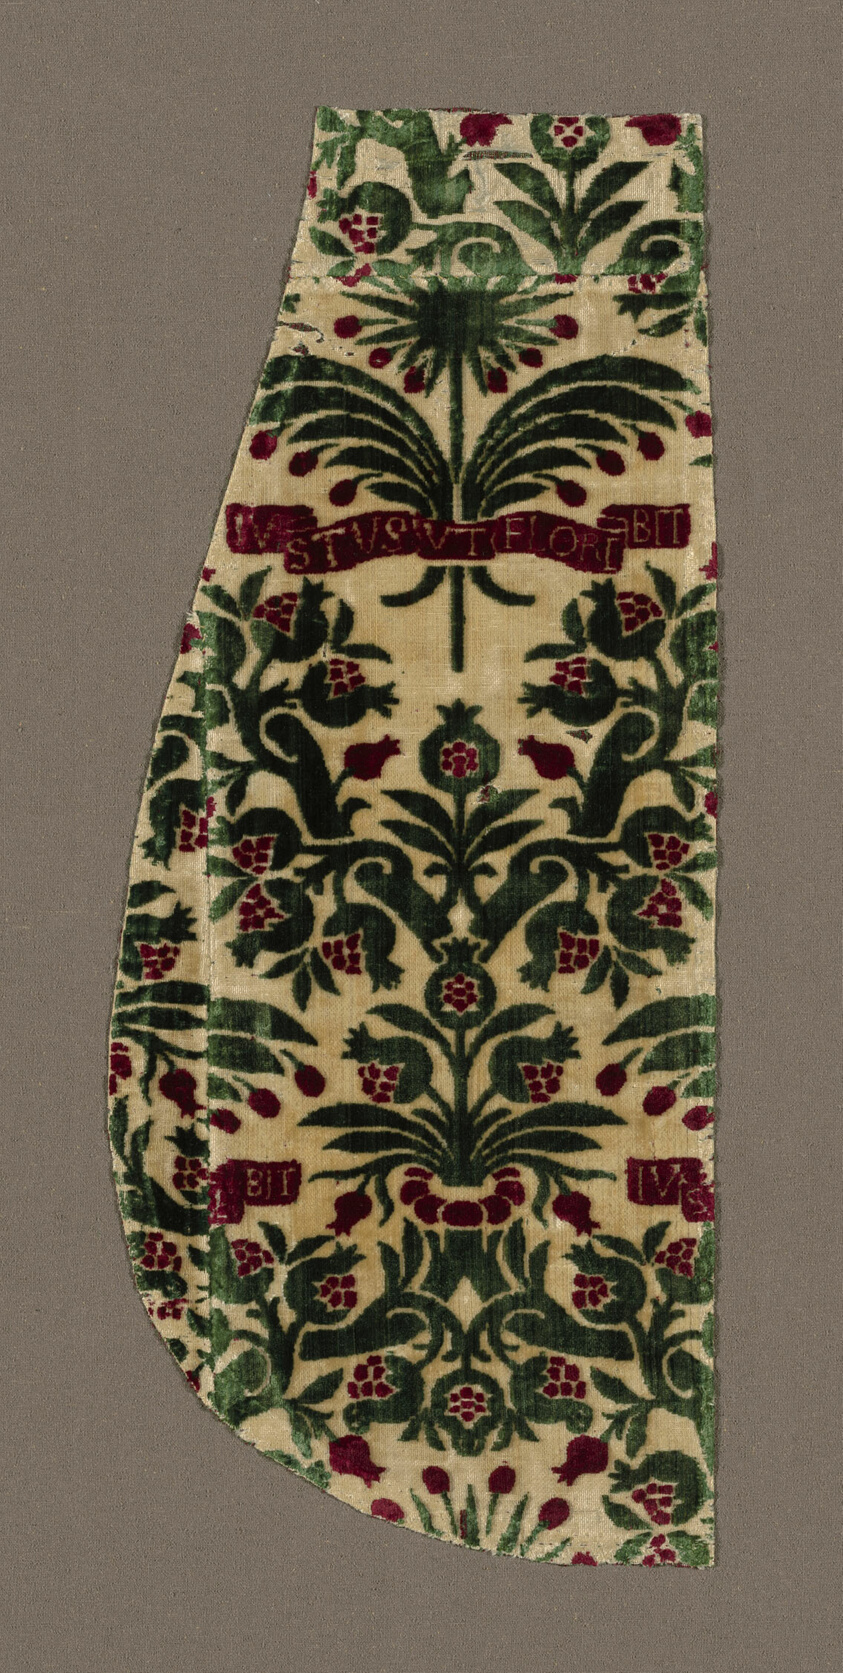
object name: Textile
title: Portion of a Chasuble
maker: Probably made for Piero Soderini (1452–1522); Italy, probably Florence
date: 1450/1500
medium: Silk, satin weave, cut solid velvet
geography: Italy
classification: textile; weaving - velvet; liturgical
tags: fashion